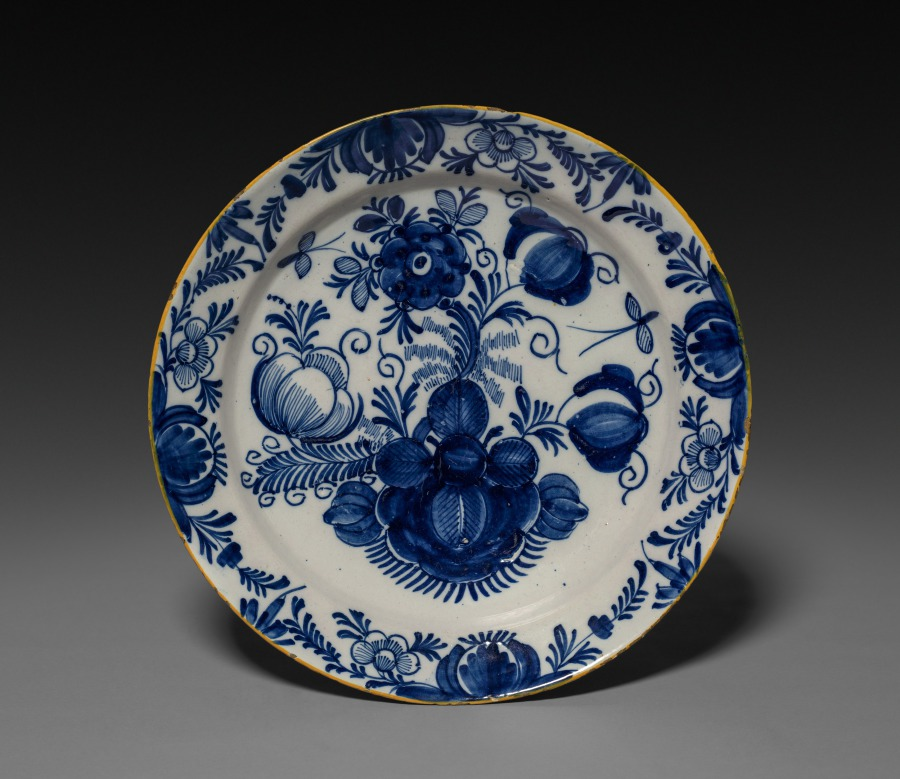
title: Delftware Plate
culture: Netherlands, Holland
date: c. 1750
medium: glazed ceramic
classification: Ceramic